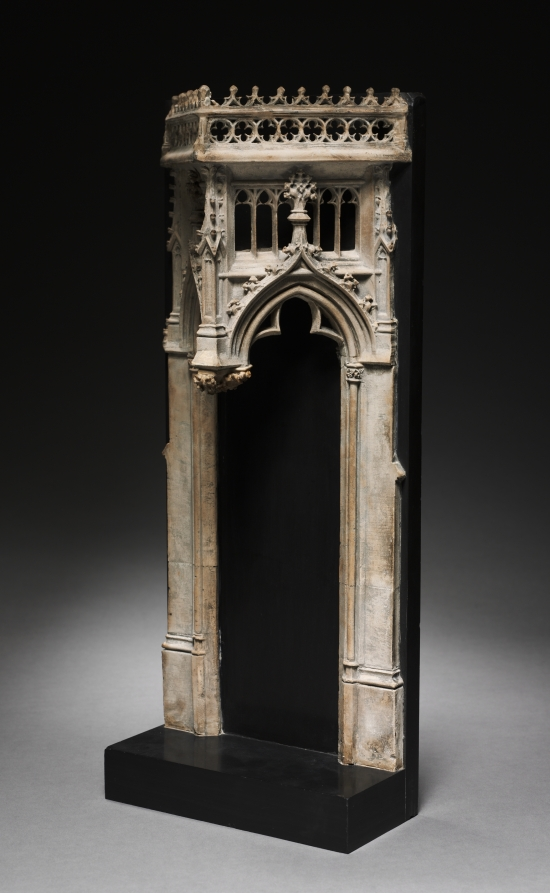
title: Architectural Canopy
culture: France, Burgundy, 15th century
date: c. 1450–1475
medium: limestone from Tonnerre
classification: Sculpture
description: Part of a pair of canopies, both must have originally belonged to an architectural ensemble like a tomb or a choir screen set within a church. Strikingly carved as architecture in miniature, they contain all of the elements of Flamboyant Gothic architecture of the late 15th century, so named after its flame-like stone tracery with wavy ornaments. This style of architecture is characterized by its intricacy of detailing and virtuosity of workmanship. Small sculptures may have originally occupied the space beneath the canopies.